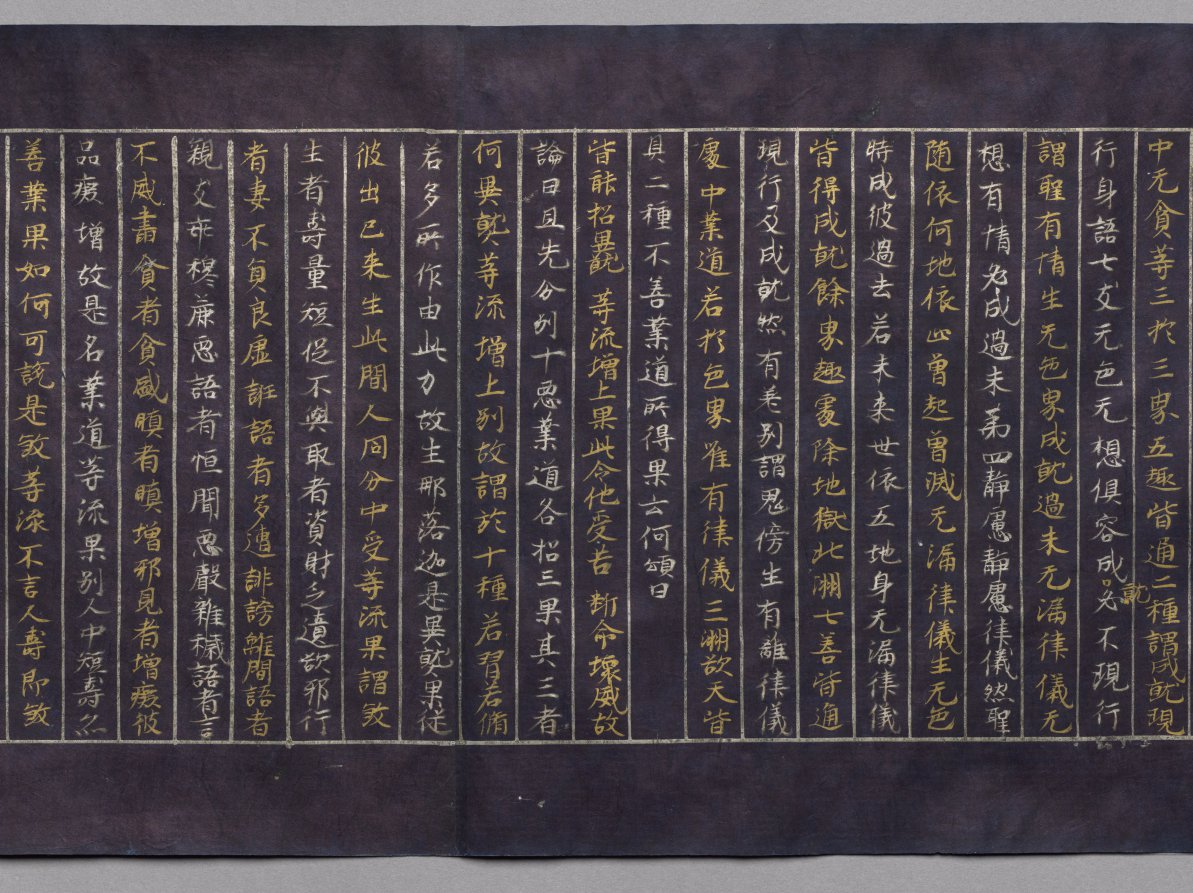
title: Meta-Discourse on the Teachings from the Treasury (Abidharmakosha-Bhashya)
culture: Japan, Heian period (794–1185)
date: 1100s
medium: handscroll; gold and silver on indigo-dyed paper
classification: Manuscript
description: This religious text relates some of the teachings of the great fourth-century Indian Buddhist scholar Vasubhandhu. The text analyzes human consciousness in its relationship to the environment and transformations that occur during meditation. This scroll is the 17th part of a 30-part translation of the text by Xuanzang, an eminent seventh-century Chinese monk.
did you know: The frontispiece depicts the Buddha Shakyamuni preaching in a paradisical landscape.